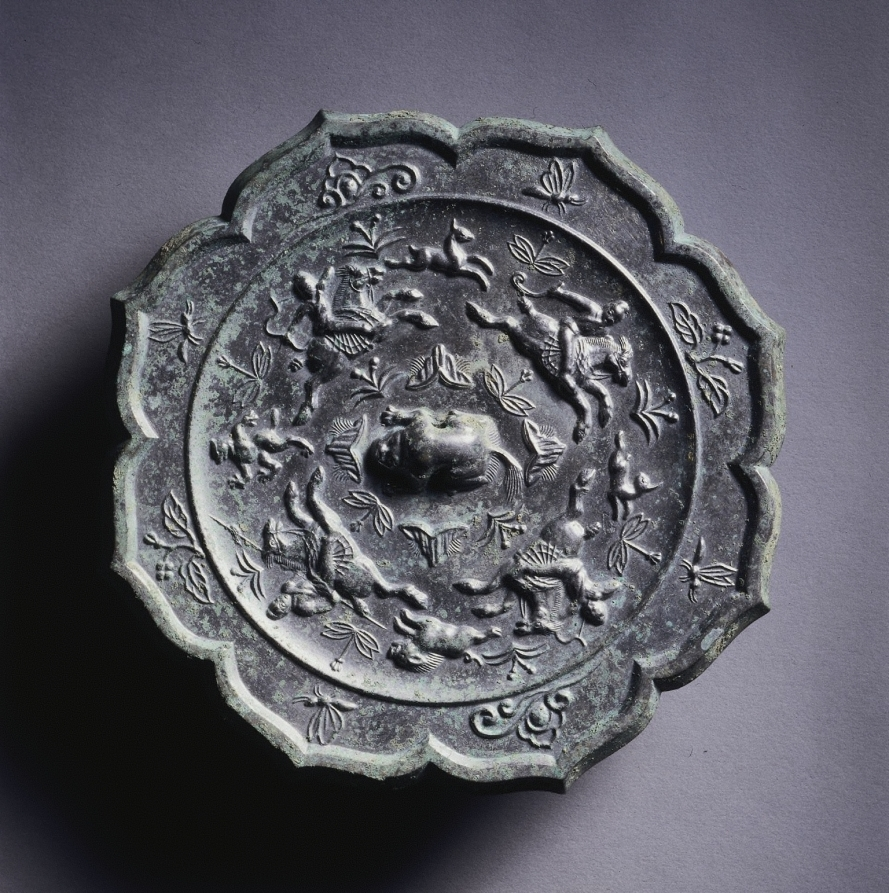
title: Octafoil Mirror with Hunters and Prey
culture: China, Tang dynasty (618-907)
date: late 600s–early 700s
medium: bronze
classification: Metalwork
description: Corrosion has covered this mirror's surface with an uneven layer of green patination. Otherwise, this medium-sized mirror is strong in impact and dynamic in movement. The border arrangement is typical, with eight compartments for four types of decoration arranged in pairs across the same axis. Other than the cloud scrolls, which have been radically transformed so as to be almost unrecognizable, the rest are fine portrayals of insects and plants—a typical arrangement for Tang mirrors, perhaps of the eighth century. The chief focus, of course, lies in the inner circle, which has gained in size and dimension. At its center is a crouching beast. Action is most apparent in the sequence of the hunt, with hunters on horses, shooting with bow and arrow at the prey, or carrying a long lance for the attack. The prey includes bear, deer, rabbit, and boar—their size and pose being sufficiently varied. The insistence on horror vacui (fear of empty spaces) is apparent; wherever the likelihood of a vacant space exists, the maker of the mirror has inserted a plant to fill the void. The result is a fast-paced whirling motion that never ends.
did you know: Four stylized mountains in diminutive scale represent the cardinal directions around the animal-shaped knob at the center of the mirror.